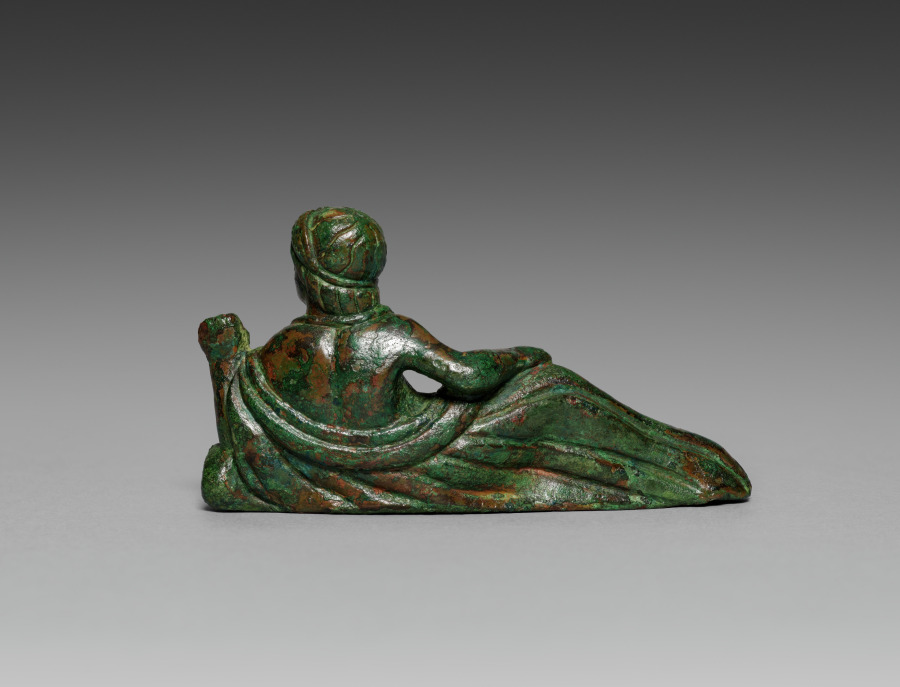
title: Vessel Ornament of Banqueter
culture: Etruscan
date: probably 400–375 BCE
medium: bronze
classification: Sculpture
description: This bronze banqueter figurine was one of six once adorning the rim of a large basin, now lost. Cast in molds with individualized details, most have grooves on their underside to attach to the basin. Minute traces of gilding remain on areas of clothing and skin (mostly visible only under magnification), suggesting that they may have been completely gilded. Two handles in the form of hippocampi, horses with serpentine tails, also belonged to the basin and are now displayed at the Michael C. Carlos Museum at Emory University. The basin may have been used to hold liquid for a banquet, or was perhaps funerary. This banqueter tilts his head toward his left hand, which may have once held an object, now lost. His right arm rests on his hip. Unlike the other banqueters, this figurine does not have exposed feet and his body curves slightly when viewed from above. This suggests that this figurine may have been made for a different initial use before being added to this set.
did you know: The Etruscan banquet shared similarities with the Greek symposium where guests reclined and drank wine.